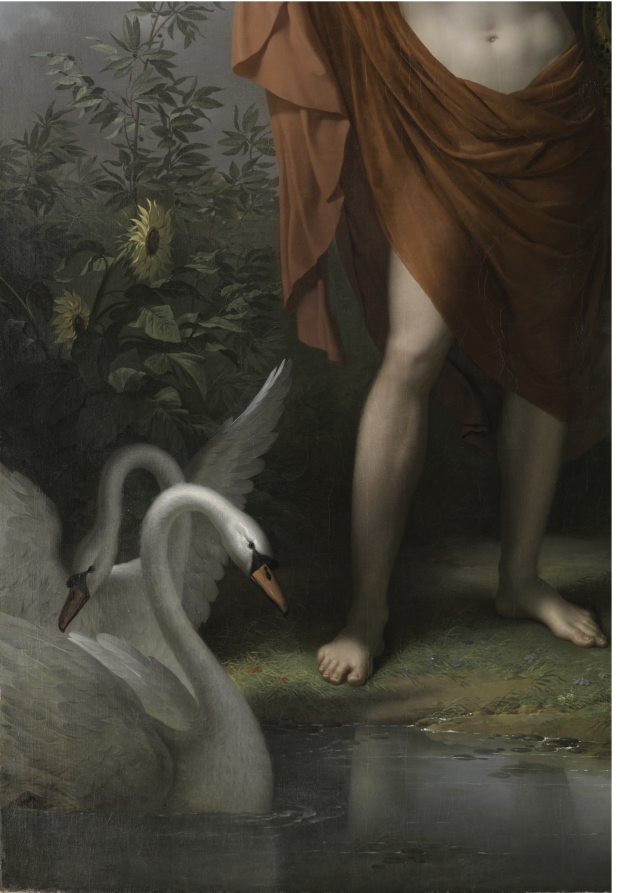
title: Apollo, God of Light, Eloquence, Poetry, and the Fine Arts with Urania, Muse of Astronomy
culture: France, late 18th century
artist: Charles Meynier (French, 1768–1832)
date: 1798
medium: oil on canvas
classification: Painting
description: A recipient of the Grand Prix de Rome in 1789, Charles Meynier became a member of the Académie des Beaux-Arts in 1815 and painted large ceiling decorations at the Louvre and numerous pictures glorifying the Napoleonic legend. Erato, Muse of Lyrical Poetry belongs to a cycle of five paintings executed to fulfill a commission from businessman François Boyer-Fonfréde. They were intended to decorate his home in his native Toulouse and constitute a rare instance of a complete cycle of major paintings that remain intact rather than being split up and separately dispersed.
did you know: Urania leans on a starry orb, indicating her role as the muse of astronomy.